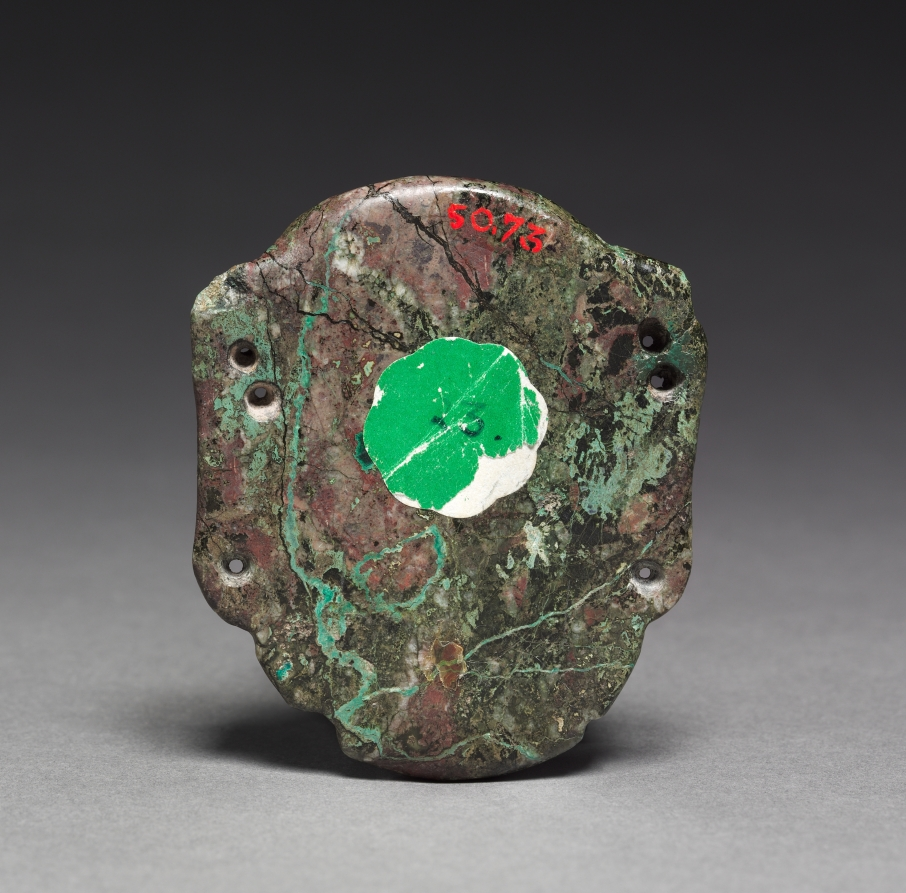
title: Mask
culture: Mexico, Guerrero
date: 1–900 CE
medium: jadeite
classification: Jade